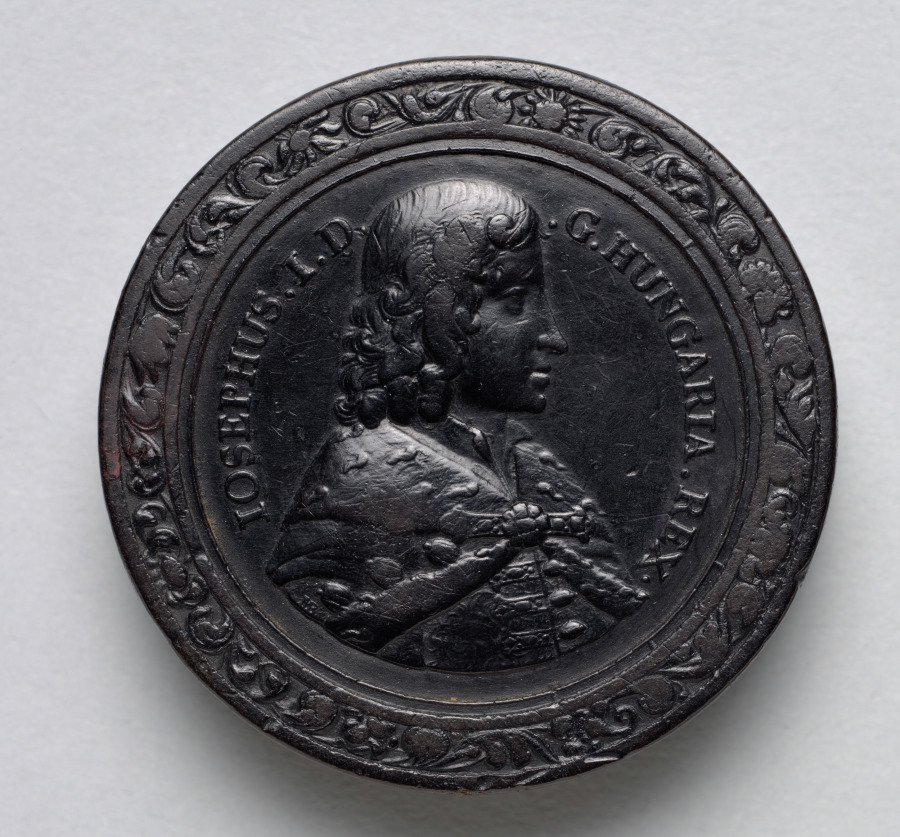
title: Gaming Piece (reverse)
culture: Germany, late 17th-early 18th Century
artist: Martin Brunner (German, 1659–1725)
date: c.1700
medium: wood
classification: Furniture and woodwork